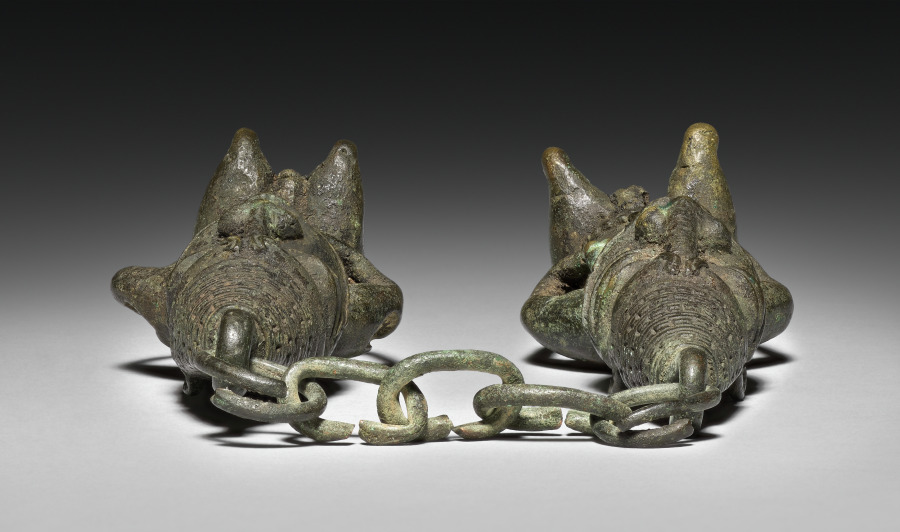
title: Pair of Ritual Staffs (ẹdan Ògbóni)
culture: Africa, West Africa, Nigeria, Yorùbá-style maker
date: possibly 1800s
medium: Copper alloy and iron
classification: Sculpture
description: The chain connecting these two figures allows them to be worn in public by a member of the Ògbóni or Òṣùgbó association as authority emblems. The male on the right gives the association’s typical salute by clasping his left fist on the right one, while the female on the left holds her breasts as a sign of welcome and generosity. The use of copper alloy and iron expresses Ògbóni/Òṣùgbó's concerns with longevity and durability.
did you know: Imagine how this would look when its owner wore it; the chain would go around the back of the neck and the figures would rest on their chest.